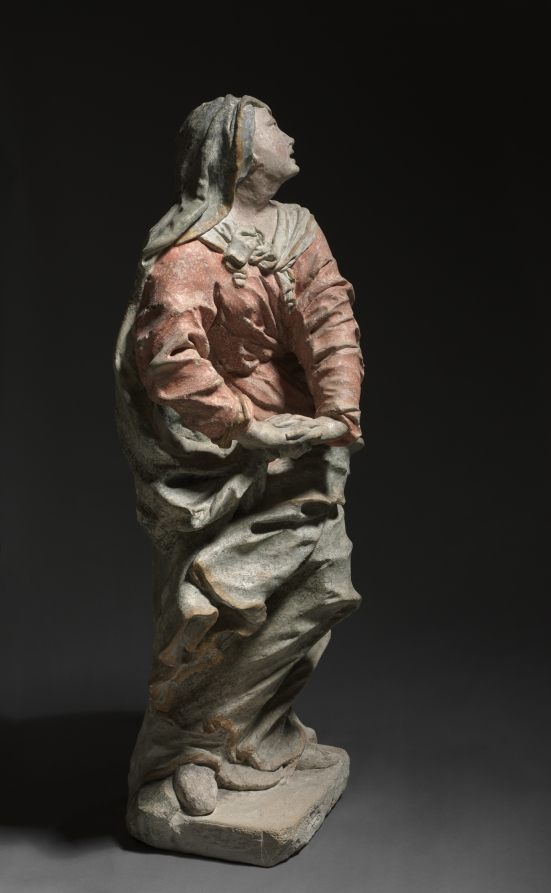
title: Mourning Mary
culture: Austria, Vienna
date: c. 1710–40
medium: stone with traces of original color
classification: Sculpture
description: This figure’s orientation suggests it may have been part of a Crucifixion group, situated to the left of Christ with another figure to the right to balance the composition. Fingers knotted in prayer, lips parted in anguish, the Virgin appears to recoil from the sight of her son on the cross. Her contorted pose and agitated draperies are visible manifestations of her grief. Obvious signs of wear to the stone suggest that the group may have been set outside of a church, perhaps atop pillars.